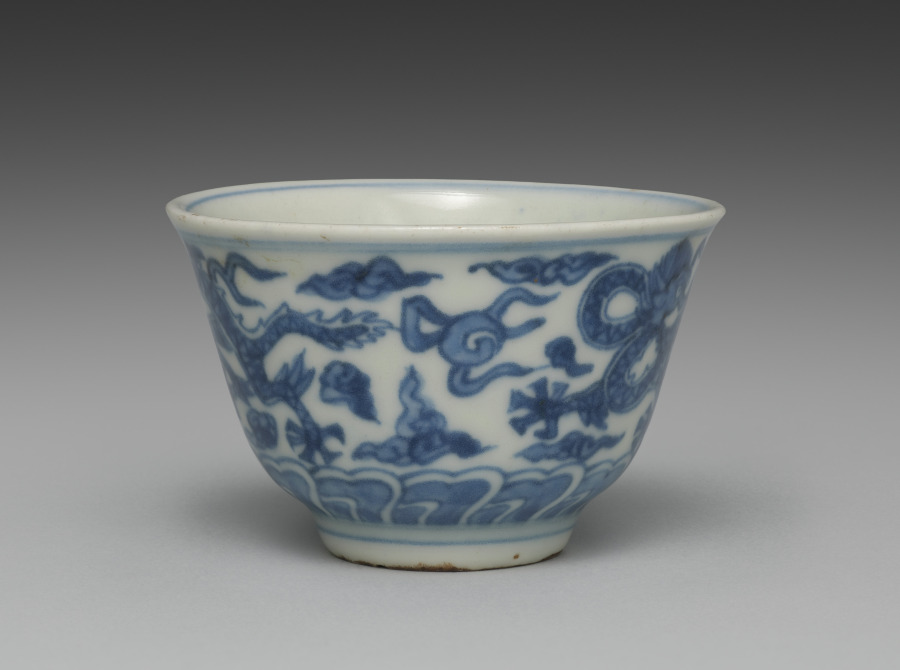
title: Cup from Tea Cups with Dragons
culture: Japan, Edo period (1615–1868)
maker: Seifū Yohei I (Japanese, 1801–1861)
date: 1840s–57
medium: One from a set of five tea cups; porcelain with underglaze blue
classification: Ceramic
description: Seifū Yohei I made both blue and white porcelains after Ming dynasty (1368–1644) Chinese wares fired in the kilns at Jingdezhen for export. He also made colorful stoneware in the style of his teacher, Nin’ami Dōhachi (Takahashi Dōhachi II) (1783–1855).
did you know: A small figure of an elephant serves as the handle for the lid.